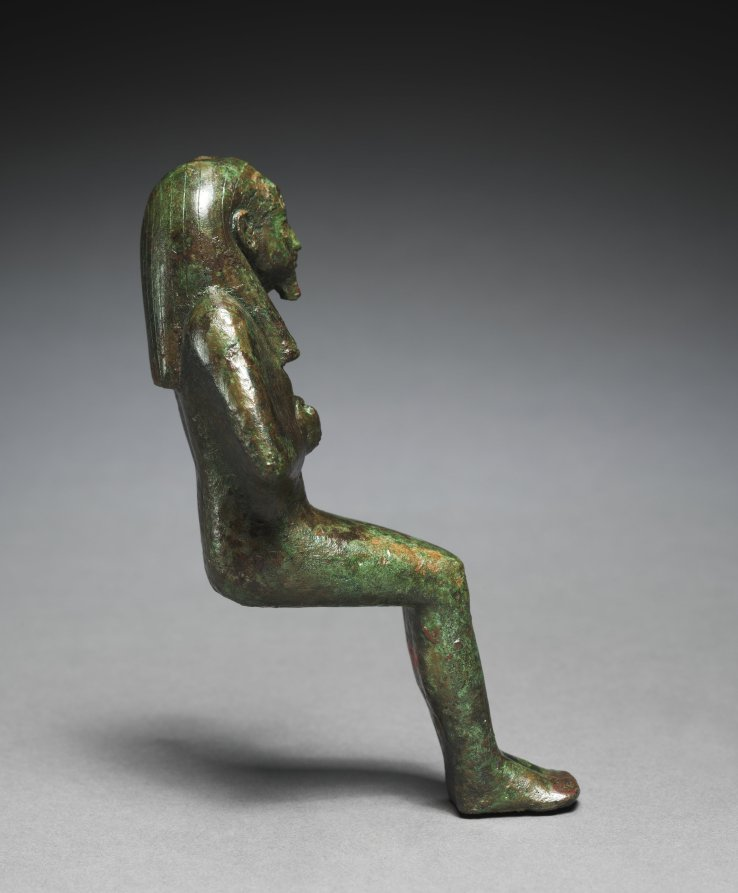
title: Statuette of Seated God, probably Osiris-lah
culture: Egypt, Late period (715–332 BCE), Dynasty 26 or later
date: 664–525 BCE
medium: bronze, solid cast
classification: Sculpture